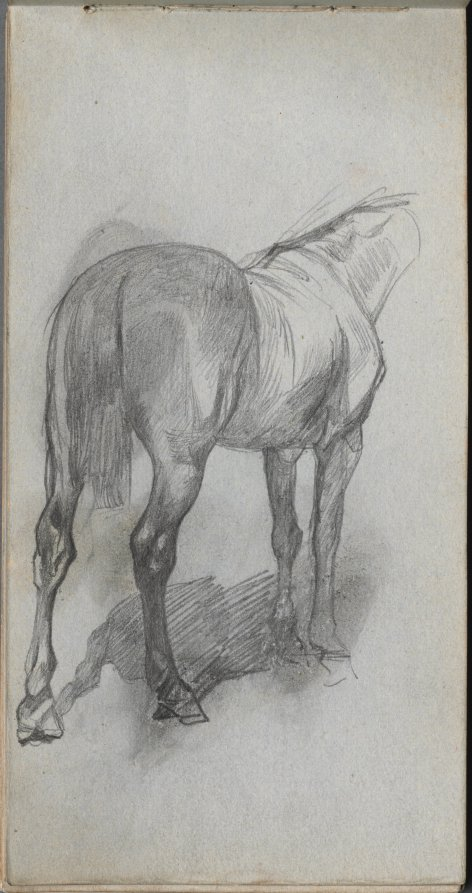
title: Sketchbook, page 76: Study of a Horse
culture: France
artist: Ernest Meissonier (French, 1815–1891)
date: c. 1860s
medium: graphite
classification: Bound Volume